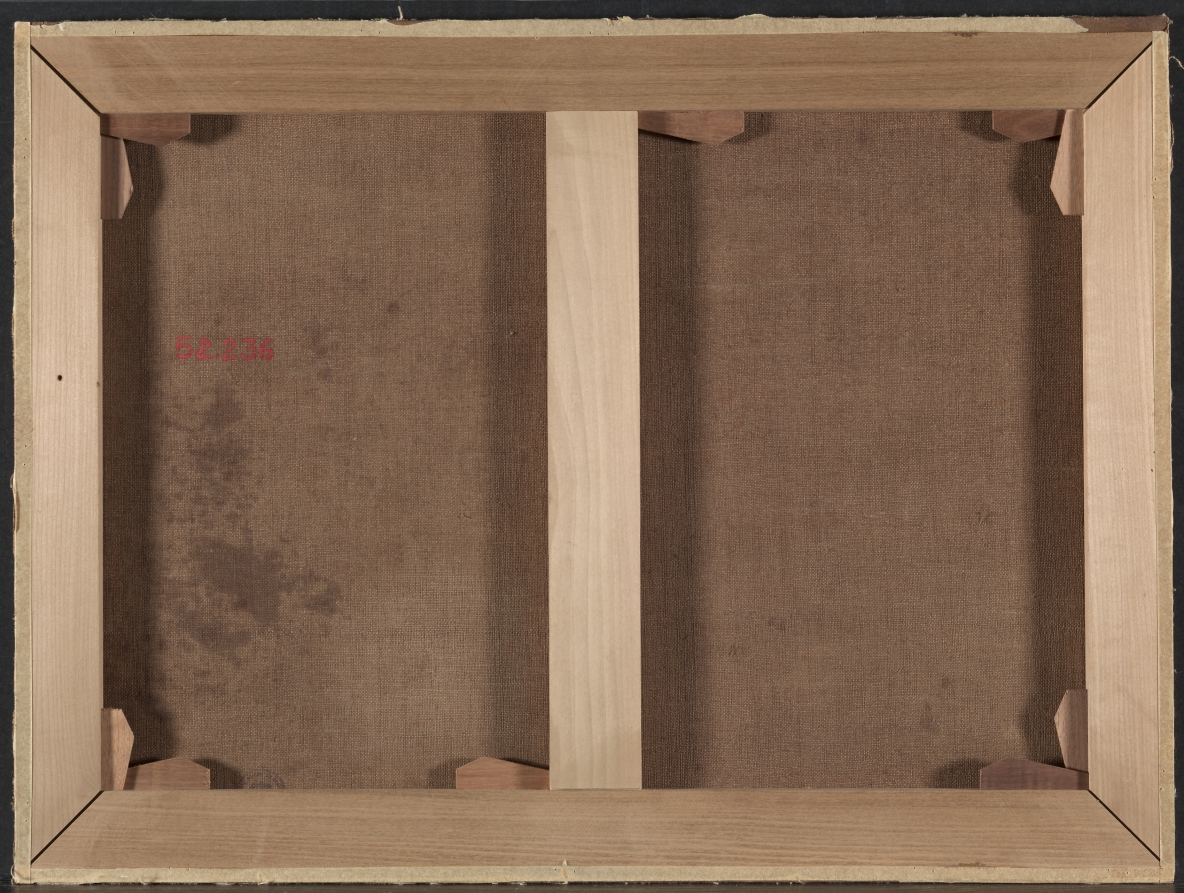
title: Tobias and the Angel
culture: Italy, 18th century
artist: Francesco Guardi (Italian, 1712–1793)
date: 1750s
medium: oil on canvas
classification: Painting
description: This series of paintings predominantly tells the Old Testament story of Abraham and Isaac, and each of the canvases treats the interaction of humans and angels. In three works, angels appear to Abraham. However, the narrative of Tobias and the Angel comes from an entirely different book of the Bible. The blind Tobit sends his son Tobias off to collect a sum of money in the distant town of Media, with the angel Raphael accompanying him in disguise as a human. This particular work depicts Raphael overseeing Tobias catching a fish, which would later be used to cure his father's blindness.